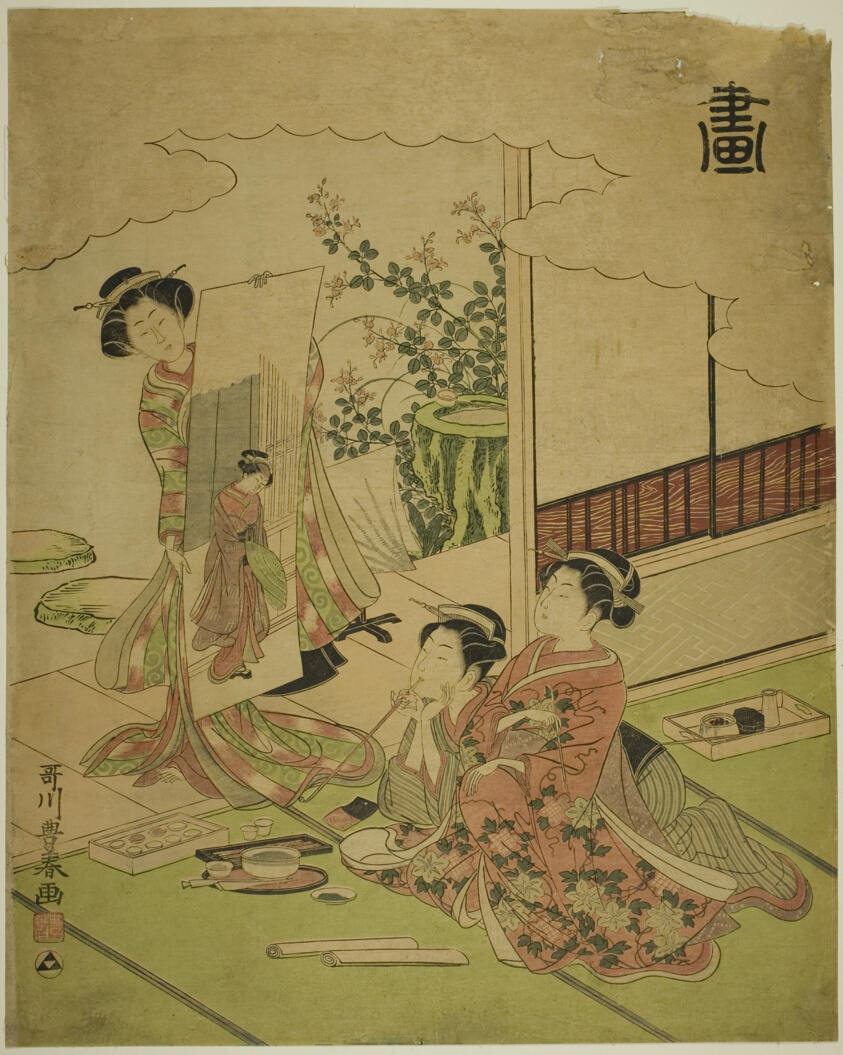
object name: Print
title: Painting (Ga), from an untitled series of the four accomplishments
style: Japanese (culture or style)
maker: Utagawa Toyoharu (Japanese, 1735-1814)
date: c. 1772/75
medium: Color woodblock print; o-oban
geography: Japan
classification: woodblock print; print; asian art